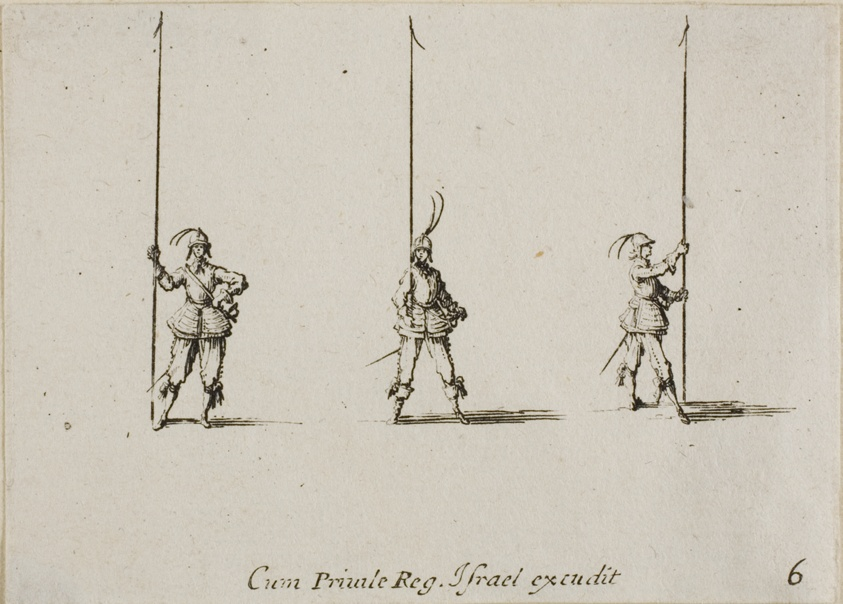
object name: Print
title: Drill with Raised Pike, plate six from The Military Exercises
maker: Jacques Callot (French, 1592-1635); published by Israël Henriet (French, 1590-1661)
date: published 1635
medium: Etching on paper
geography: France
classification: etching; print; prints and drawing